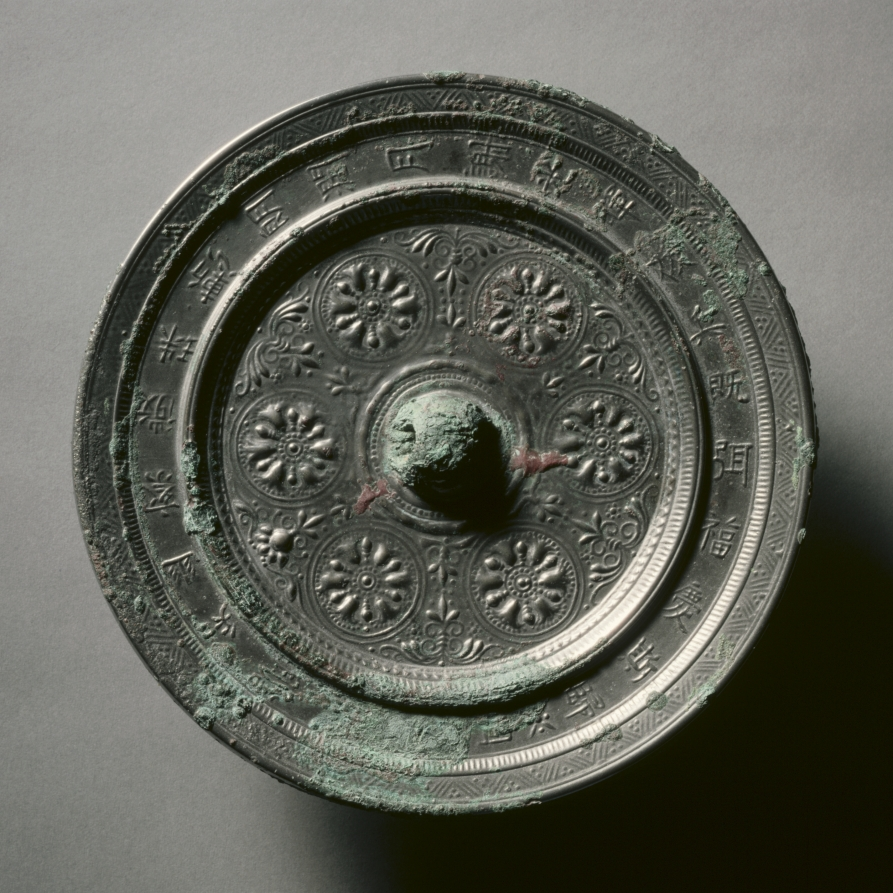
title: Mirror with Six Circular Flowers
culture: China, Tang dynasty (618-907)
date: 600s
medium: bronze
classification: Metalwork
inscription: 【】【】【】膽，知幽察微。珠慚朗潤， 月謝光輝。【】兵既弭，福慶斯歸。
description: Around the mirror’s central knob, there are six floral designs set within circles, separated by candelabra-like dividers. These flower designs later became known as "baoxiang hua 寶相花" or "flowers of precious appearance", which often remind people of Buddhist connections. The design also includes a ribbon of inscription, praising the mirror’s clarity and celebrating the end of a war.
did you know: This mirror was made to commemorate the end of a war.